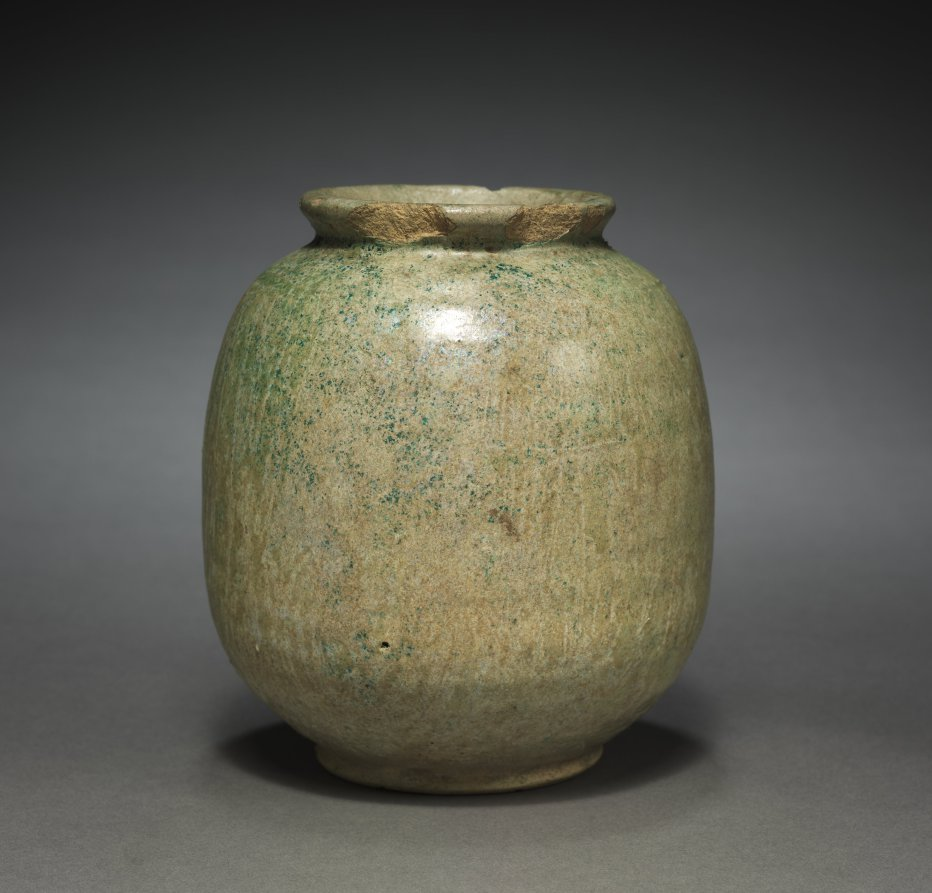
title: Ovoid Vase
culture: Parthian Empire (247 BCE–224 CE)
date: 1–200 CE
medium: terracotta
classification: Ceramic